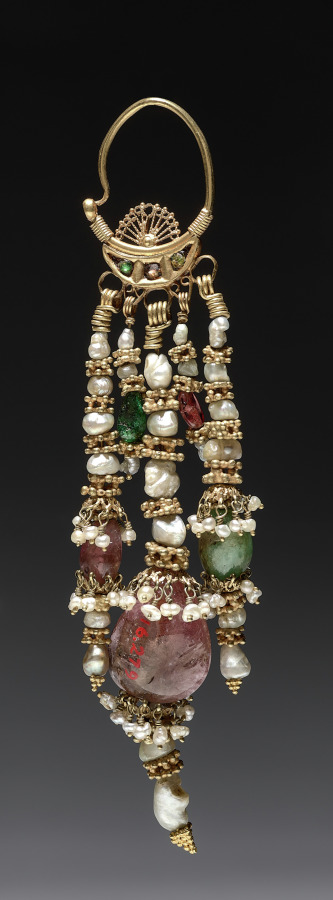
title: Earring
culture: Uzbekistan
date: 1700s–1800s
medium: silver gilt with pearls, gold beads and crystal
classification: Jewelry